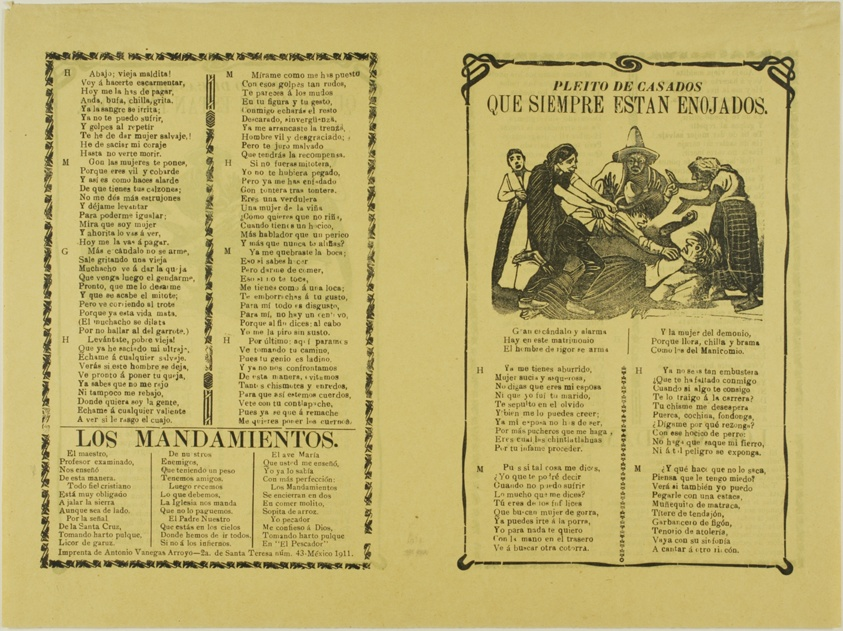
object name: Print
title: Dispute of Spouses who are Always Angry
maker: José Guadalupe Posada (Mexican, 1852-1913)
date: 1913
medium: Relief print on paper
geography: Mexico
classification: relief etching; print; prints and drawing